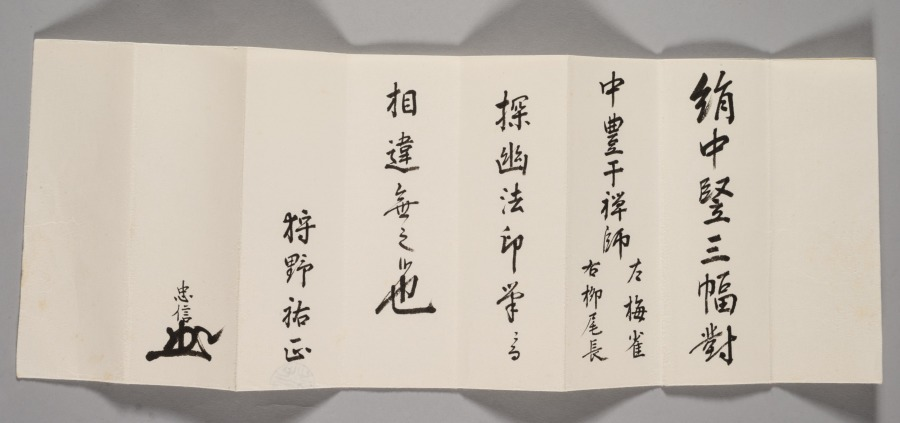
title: Sparrows on Blossoming Plum; A Sage with Tiger; Chinese Bird on Snow-Laden Branch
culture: Japan, Edo period (1615–1868)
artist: Kano Tan’yū (Japanese, 1602–1674)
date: 1661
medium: Triptych of hanging scrolls; ink and slight color on silk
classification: Painting